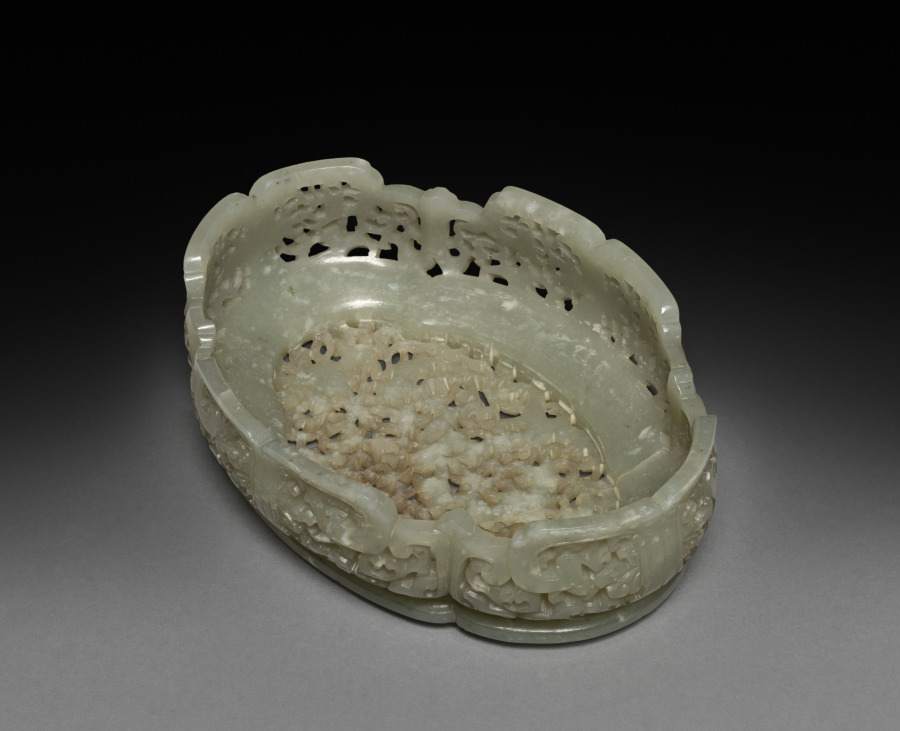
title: Oval Stand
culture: China, Qing dynasty (1644–1911), Qianlong reign (1736–95)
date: 1700s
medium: jade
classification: Jade